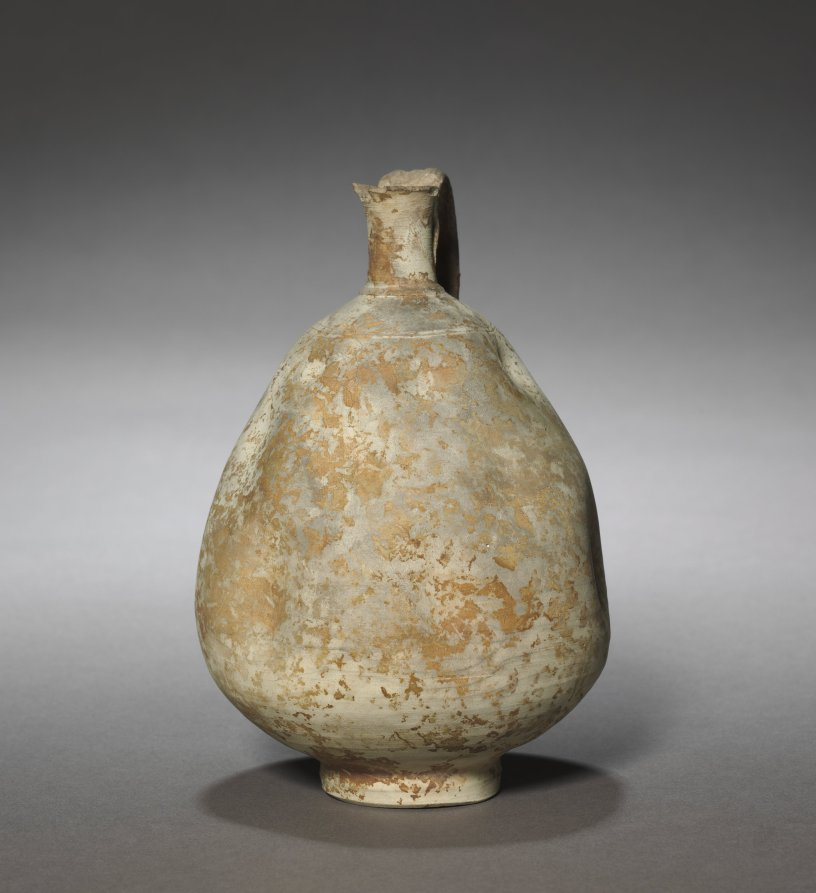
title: Jug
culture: Iran or Iraq, Seljuq period (1037–1194)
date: 1100s–1200s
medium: earthenware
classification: Ceramic